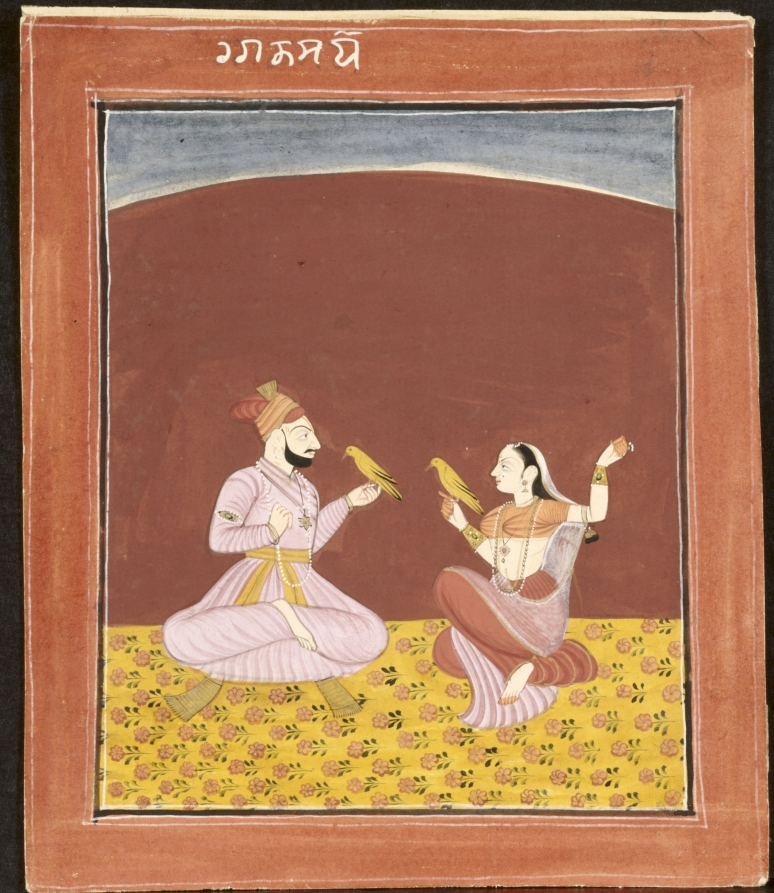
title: Kausa Ragaputra of Malkos, from a Ragamala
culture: Northern India, Pahari kingdoms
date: c. 1750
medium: Gum tempera, ink, and gold on paper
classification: Painting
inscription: raga kamoḍ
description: This specific musical mode is distinguished by a courtly couple sitting together without touching in a domestic space. They each hold a tame bird. Some consider the birds to be of the type used in elite hunting practices. The Pahari region of the northwest Himalayas was famous for its native hunting birds that were prized gifts among the nobility throughout South Asia. The woman is shown with equivalent confidence in handling the bird as her male companion. Although the inscription written in Takri script in the upper margin labels this scene as Kamod Raga of Dipak, the imagery pertains to the Kausa Ragaputra of Malkos.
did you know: This painting was part of a larger manuscript and is the first from the series to enter the CMA's collection.